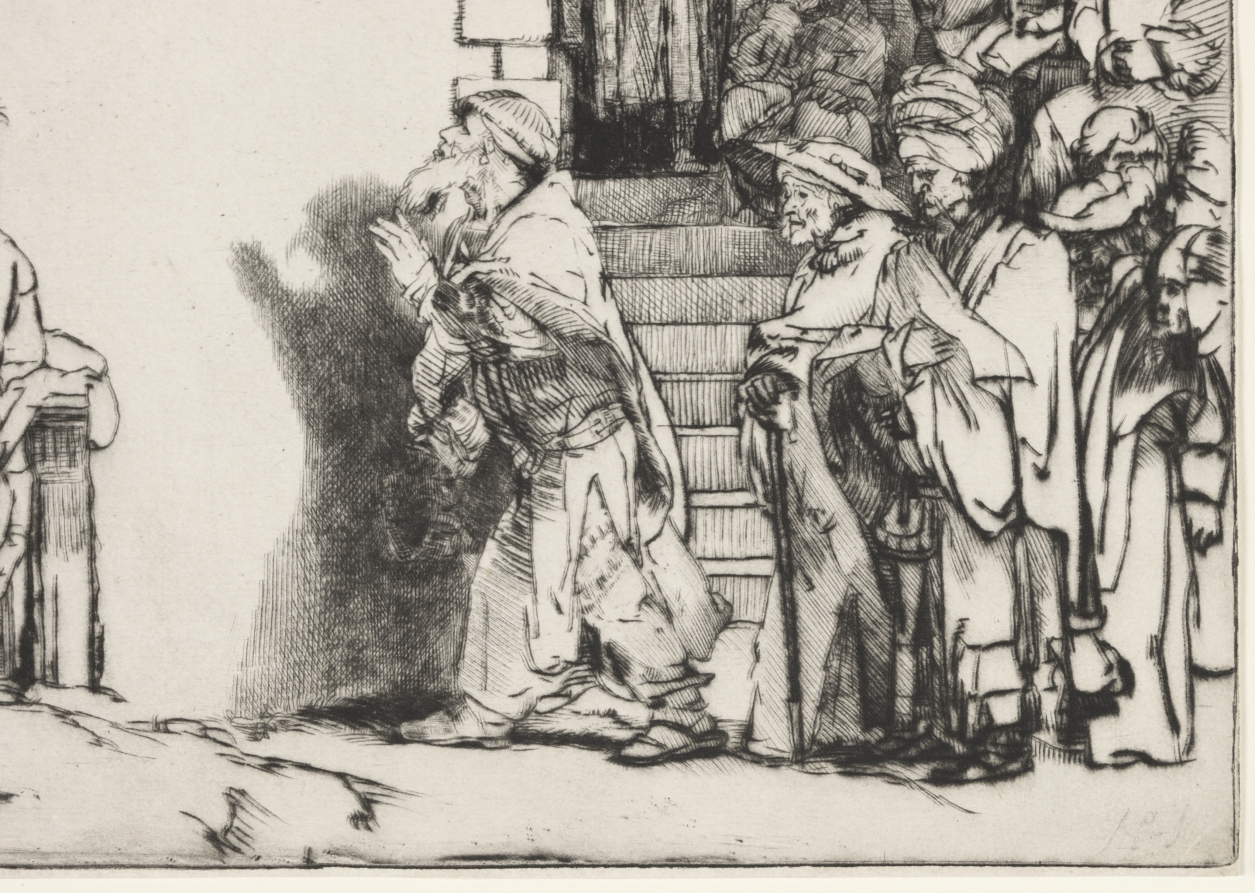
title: Ecce Homo. Christ Presented to the People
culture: Netherlands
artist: Rembrandt van Rijn (Dutch, 1606–1669)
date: 1655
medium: drypoint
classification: Print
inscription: Recto, upper left, in graphite: 79; lower left: FPS. Verso, in purple ink: Prince of Liechtenstein or Colnaghi for Liechtenstein stamp; in black ink, Zinser stamp, castle tower (rook chess piece); along side, in graphite: No. 36; along top: (illegible) name; upper left, in graphite: No 79 P(?) G (?) La Second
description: Rembrandt was an experimental and innovative printmaker and the first to execute works in pure drypoint on this monumental scale. Drypoint produces blurred lines and rich, velvety shadows, but these effects are lost as the plate wears. A limited number of rich impressions exist like this fine example of the fifth state, which demonstrates how Rembrandt redefined the expressive potential of printmaking. Rembrandt’s habit of drawing from life made him a keen observer of behavior and body language, endowing his biblical scenes with a human dimension and veracity not seen previously. The throng in Christ Presented to the People represents a cross section of the population and reflects the pictorial tradition that common humanity condemned Christ. Large areas of the imposing building, symbolizing the crushing weight and authority of the state, remain unworked so that blank white paper seems radiant in contrast to rich black shadows.